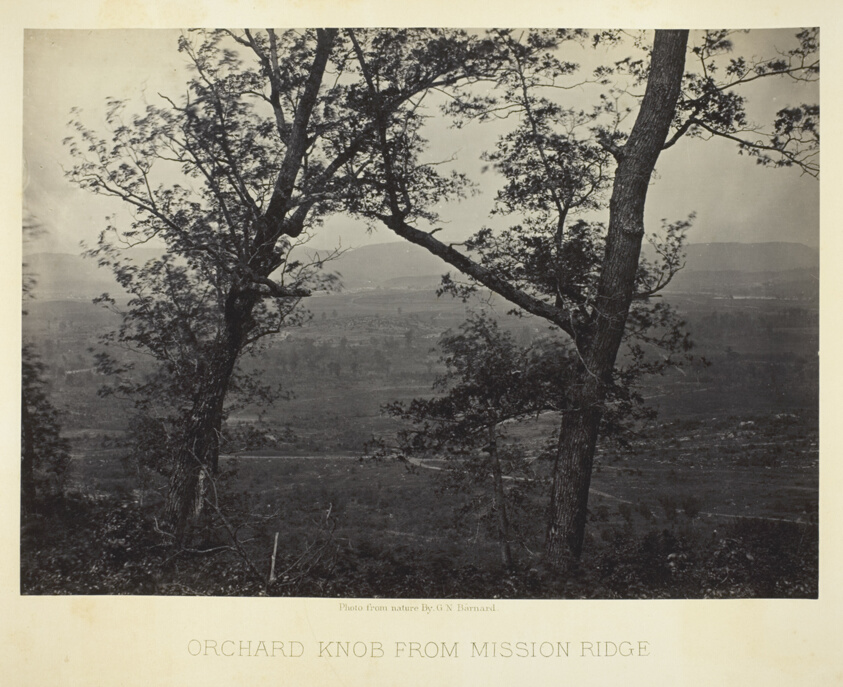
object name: Photograph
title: Orchard Knob from Mission Ridge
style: 19th century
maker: George N. Barnard (American, 1819–1902)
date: 1864/66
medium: Albumen print, plate 10 from the album "Photographic Views of the Sherman Campaign" (1866)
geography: United States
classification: albumen silver print; photographic process; photography; photograph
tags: Collected by Hugh Edwards, Sherman's Campaign 1866